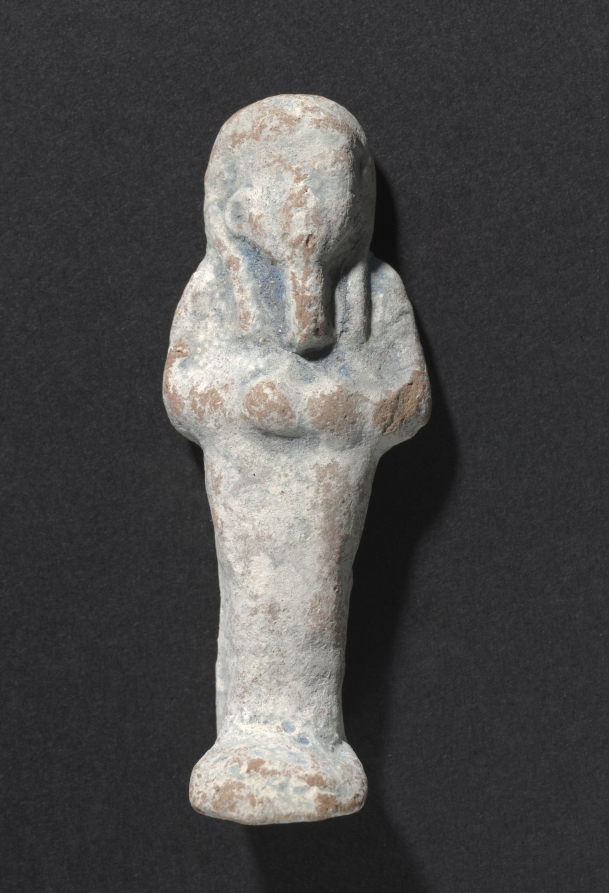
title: Shawabty of Ditamenpaankh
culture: Egypt, Late period (715–332 BCE), Dynasty 25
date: 715–656 BCE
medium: terracotta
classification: Funerary Equipment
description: High demand for shawabtys in the Late Period, a time when as many as 400 or more shawabtys were placed in the tomb with the deceased, gave rise to a specialized container for storing them: the shawabty box. This example is inscribed for the lady of the house, Ditamenpaankh, and was probably one of a pair originally made for her. The single-masted boat on the box's lid is perhaps an allusion to the pilgrimage of the deceased to the holy city of Abydos, the cult city of Osiris, king of the dead. The shawabtys inside are crude, mass-produced examples cast in an open mold. Made of terracotta, their blue paint imitates more costly shawabtys made of faience. As for the shawabty spell, it has been removed from its traditional location on the shawabty's front and relocated onto the sides of box, where it needed only to be written once, thus expediting production.